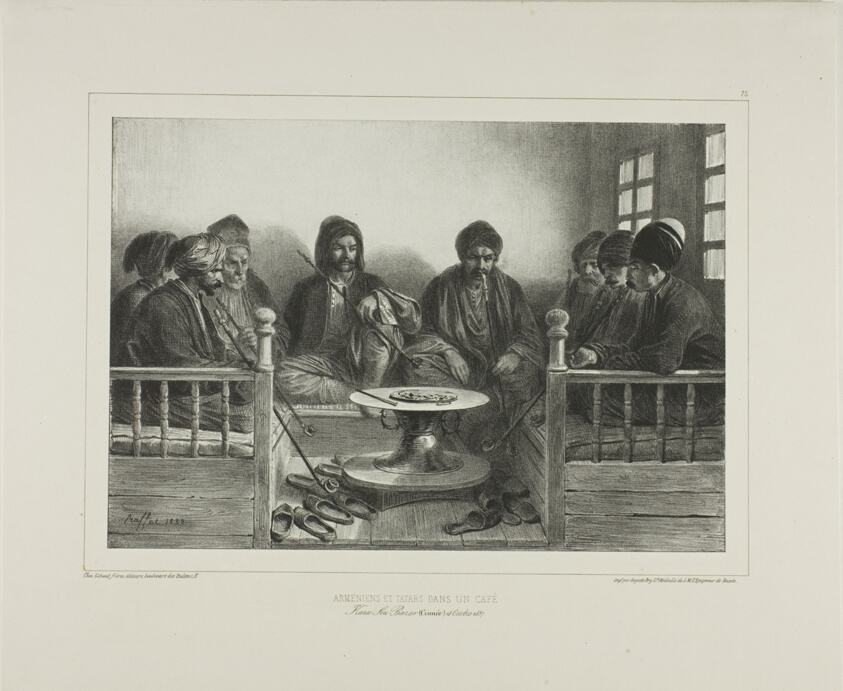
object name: Print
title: Armenians and Tartars in a Cafe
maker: Denis Auguste Marie Raffet (French, 1804-1860); printed by Auguste Bry (French, 19th century); published by Chez Gihaut Frères (French, 19th century)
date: 1838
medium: Lithograph in black on gray chine laid down on ivory wove paper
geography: France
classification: lithograph; print; prints and drawing